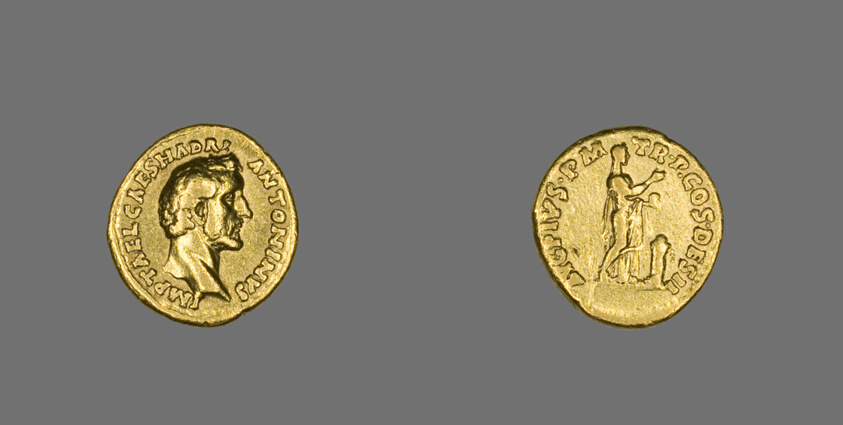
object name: Coin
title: Aureus (Coin) Portraying Emperor Antoninus Pius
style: imperial (roman), ancient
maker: Roman; minted in Rome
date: 138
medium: Gold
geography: Roman Empire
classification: coin; ancient art; struck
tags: portraits